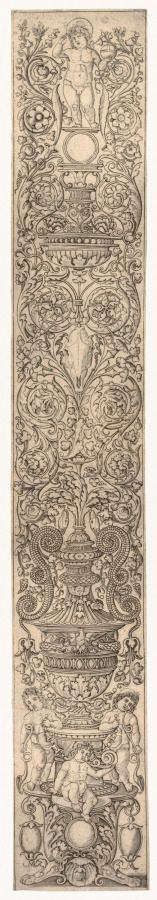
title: Three Children Blowing Horns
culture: Italy, early 16th Century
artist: Giovanni Pietro da Birago (Italian, active c. 1471–1513)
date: c. 1505–1512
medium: engraving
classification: Print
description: Printed ornamental columns were probably colored and used for interior decorations. The printed panels may have also served artists and craftsmen creating similar patterns in other materials, including wood, stone, or metal.